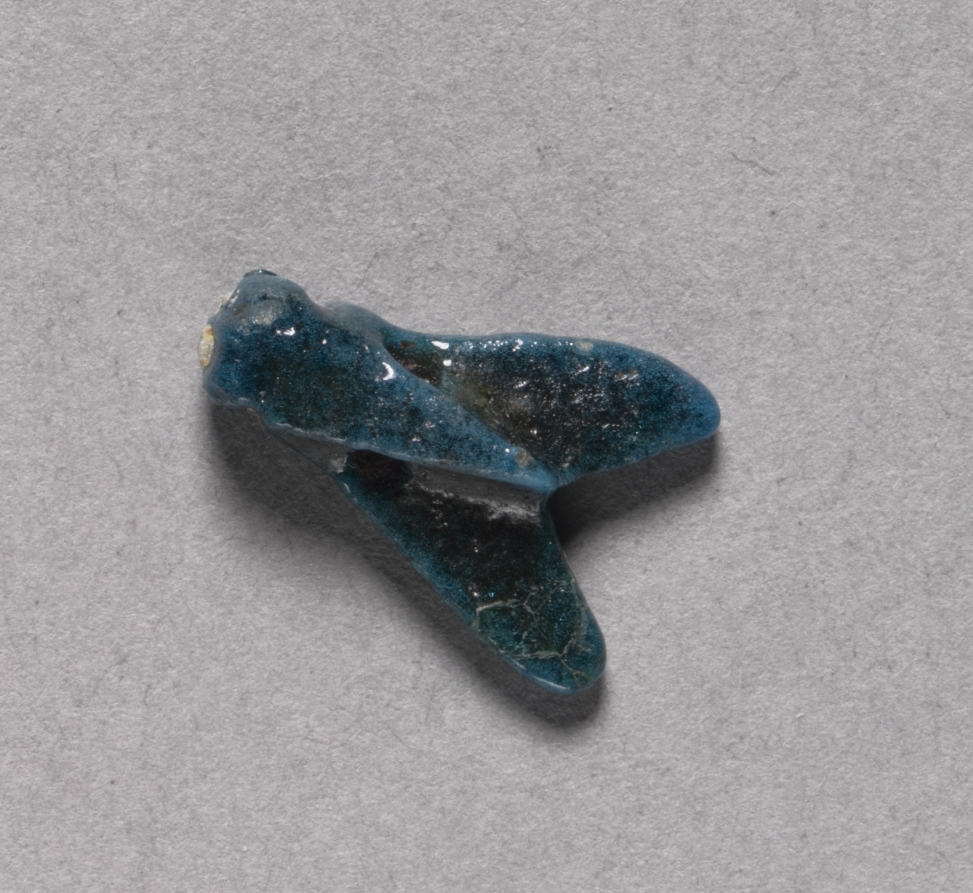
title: Fly Amulet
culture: Egypt, Middle Kingdom (2040–1648 BCE)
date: 2040–1648 BCE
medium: deep turquoise green faience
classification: Amulets